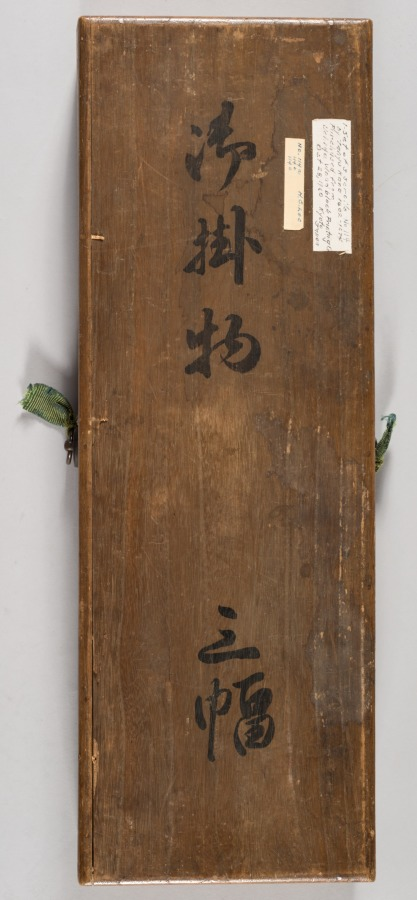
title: Sparrows on Blossoming Plum; A Sage with Tiger; Chinese Bird on Snow-Laden Branch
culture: Japan, Edo period (1615–1868)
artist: Kano Tan’yū (Japanese, 1602–1674)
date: 1661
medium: Triptych of hanging scrolls; ink and slight color on silk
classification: Painting